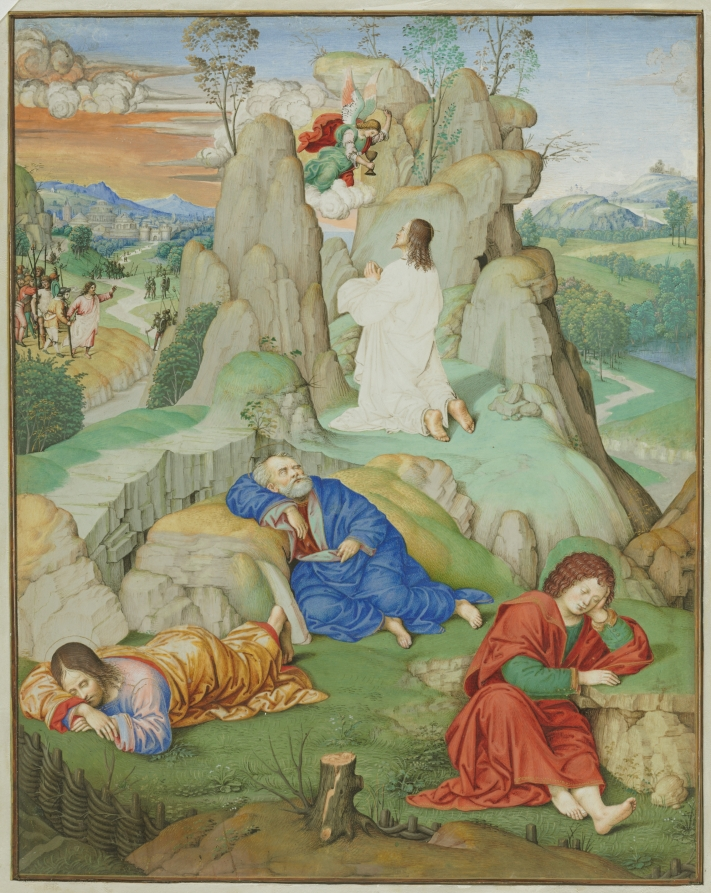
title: Full Page Miniature: The Agony in the Garden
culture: Italy, Umbria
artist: probably by Timoteo Viti (Italian, 1469–1523)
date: 1490–1500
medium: tempera on vellum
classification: Manuscript